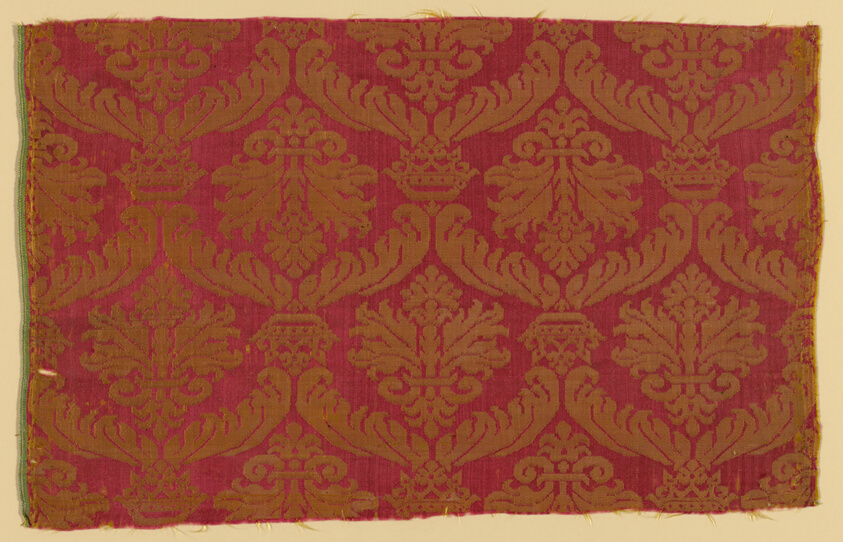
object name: Textile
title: Fragment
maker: Italy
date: 1550/1650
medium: Silk, 4:1 satin damask weave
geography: Italy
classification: textile; weaving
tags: crowns, flowers, foliage